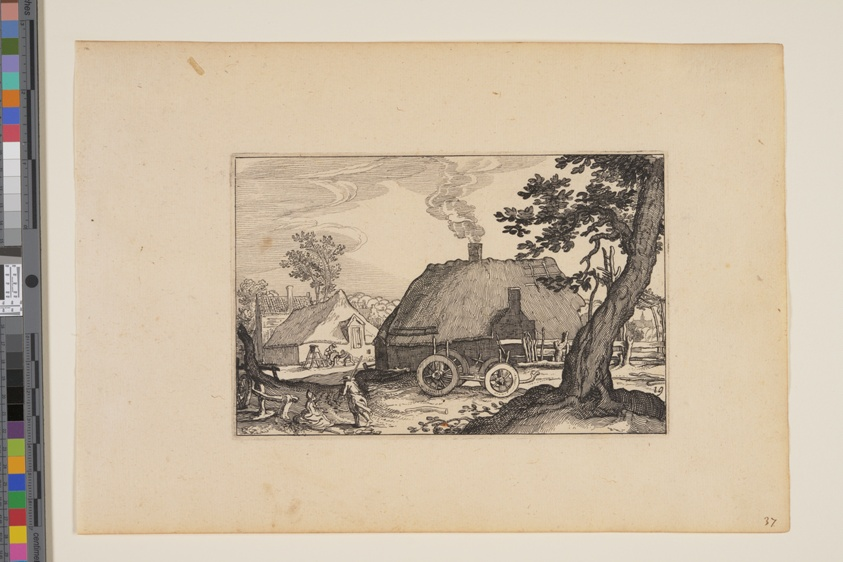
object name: Print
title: Farms, Chassis of a Cart in Centre, from Landscapes (Verscheyden aerdige Lanthuysen...)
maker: Claes Jansz. Visscher (Netherlandish, c. 1550–c. 1612); after Abraham Bloemaert (Dutch, 1566–1651)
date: 1620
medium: Etching on ivory laid paper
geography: Netherlands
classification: print; paper; prints and drawing; etching